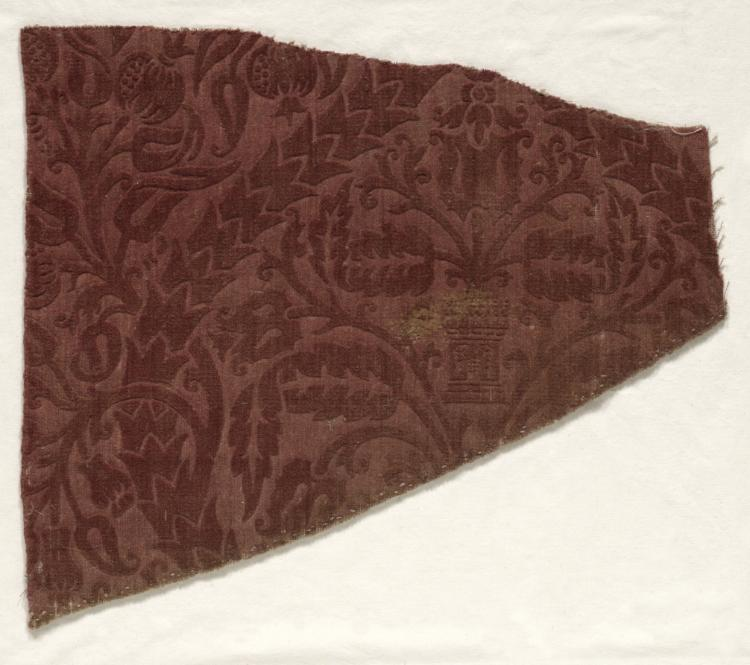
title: Fragment of Wool Velvet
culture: Spain, early 16th century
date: early 16th century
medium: wool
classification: Velvet